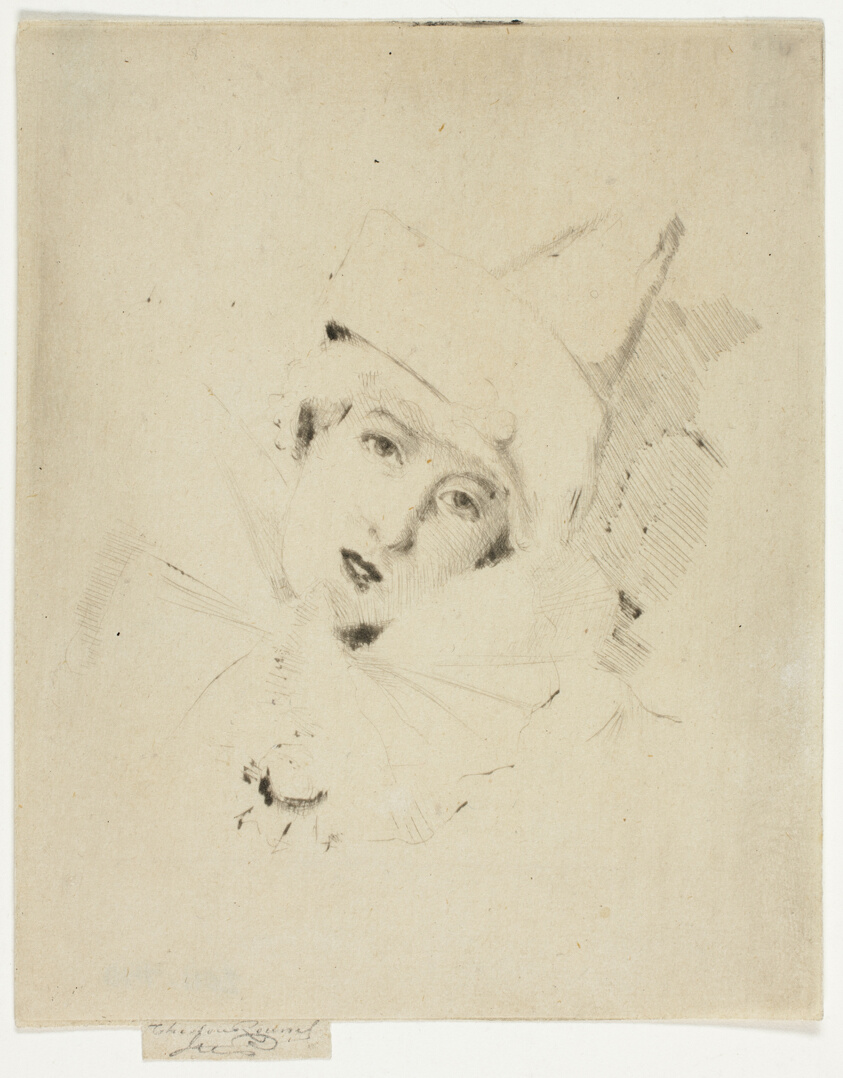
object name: Print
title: Pierrot, Portrait of the Lady A. C.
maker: Theodore Roussel (French, worked in England, 1847-1926)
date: 1888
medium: Drypoint in black on cream wove paper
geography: England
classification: drypoint; print; prints and drawing